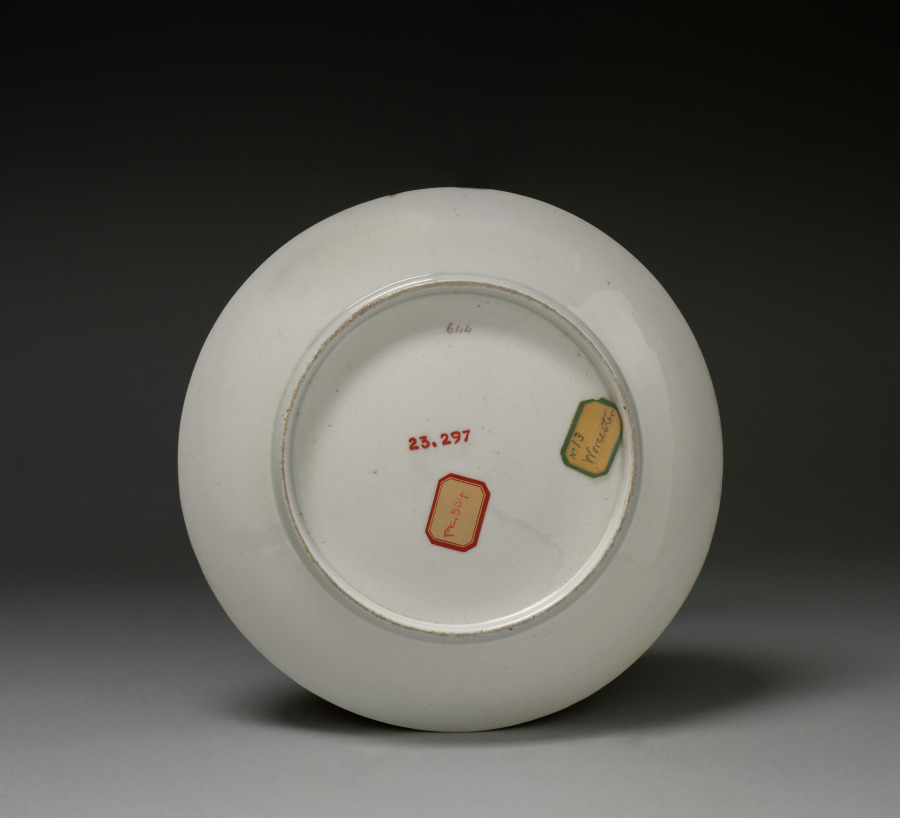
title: Saucer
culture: England, late 18th century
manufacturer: Worcester Porcelain Factory (British, established 1751)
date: late 1700s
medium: porcelain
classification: Ceramic